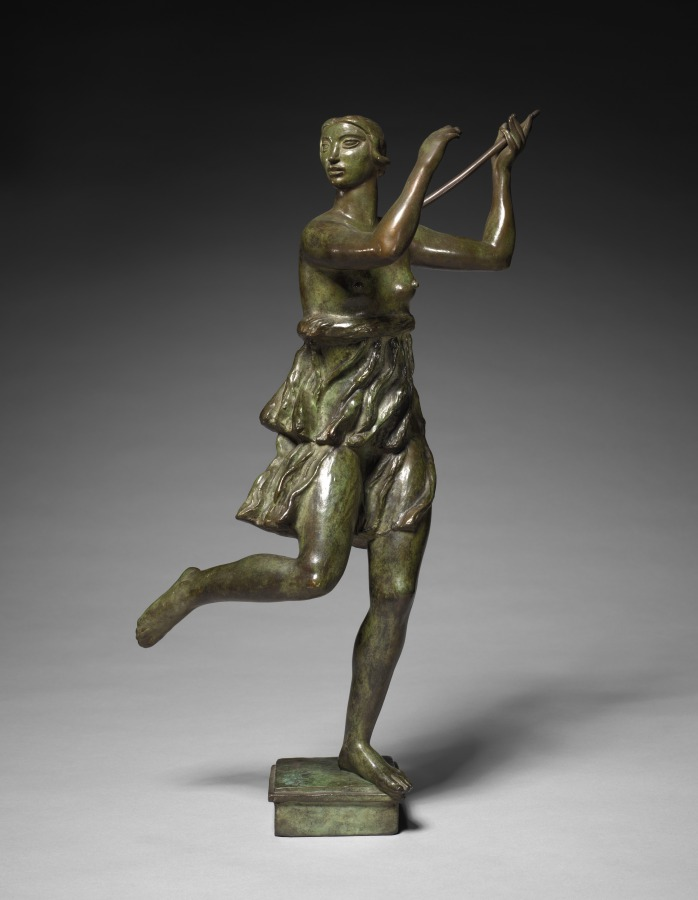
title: Diana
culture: Sweden, 20th century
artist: Carl Milles (Swedish, 1875–1955)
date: 1927–1928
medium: bronze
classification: Sculpture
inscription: Signed on back of base: "Milles"